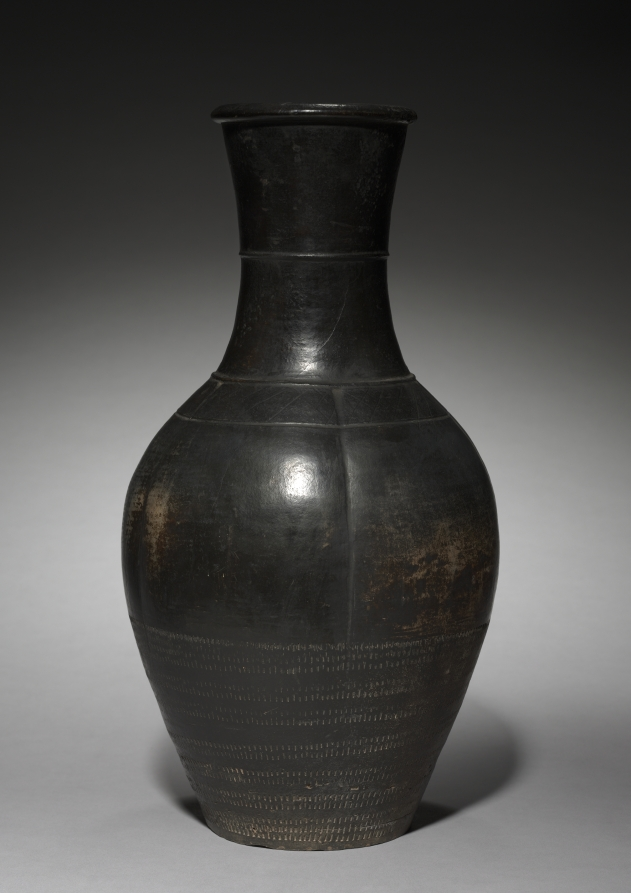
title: Vase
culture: Northeast China, Liao dynasty (916-1125)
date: 916–1125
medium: burnished stoneware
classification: Ceramic